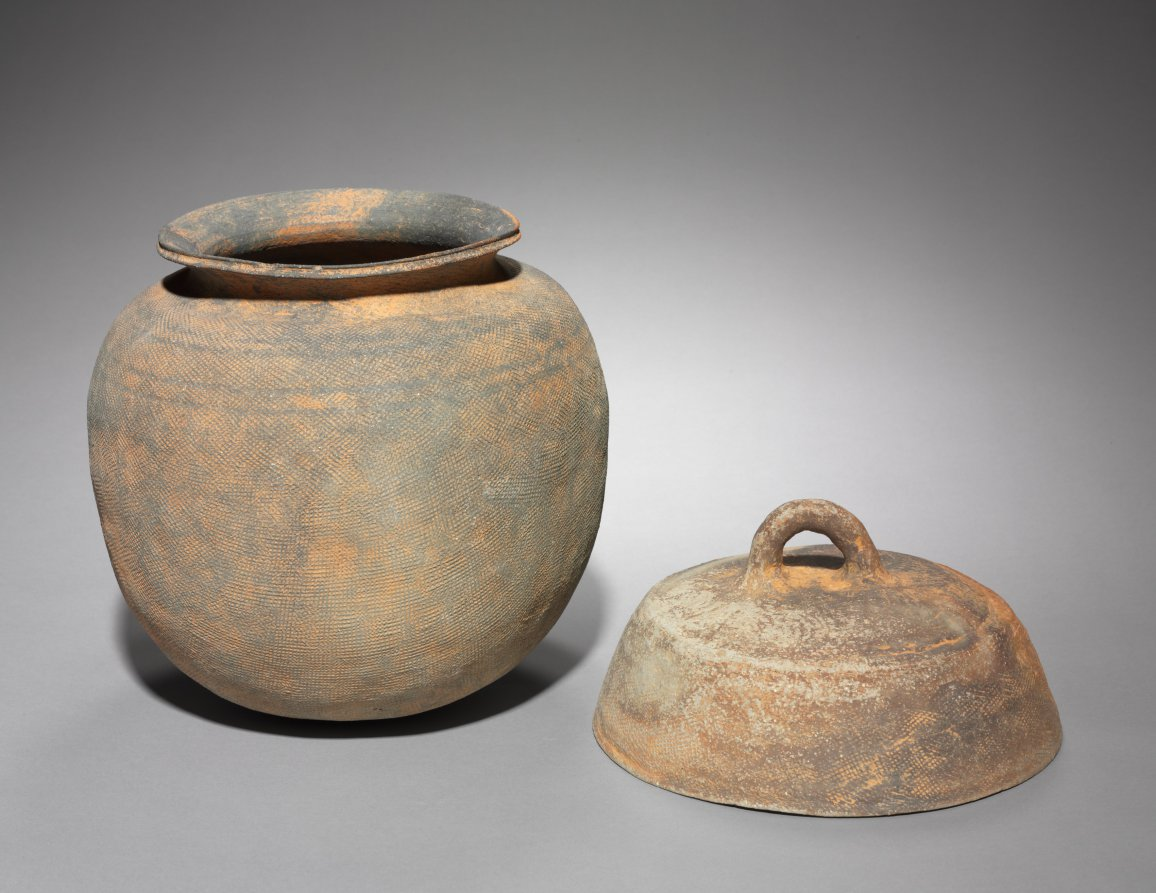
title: Jar with Loop Handle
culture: Korea, Baekje kingdom (18 BCE–660 CE)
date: 200s–300s CE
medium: earthenware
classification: Ceramic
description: Closed kilns built on hillsides became widely used for producing this type of pottery vessel in Korea during the Three Kingdoms period. Both its gray color and shimmering glaze are the result of the reduction of oxygen in the closed kiln chamber. The pounding technique (tanal in Korean) on the surface strengthened the clay body, leaving behind a geometric pattern.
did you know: The pounding technique (tanal in Korean) on the surface strengthened the clay body.